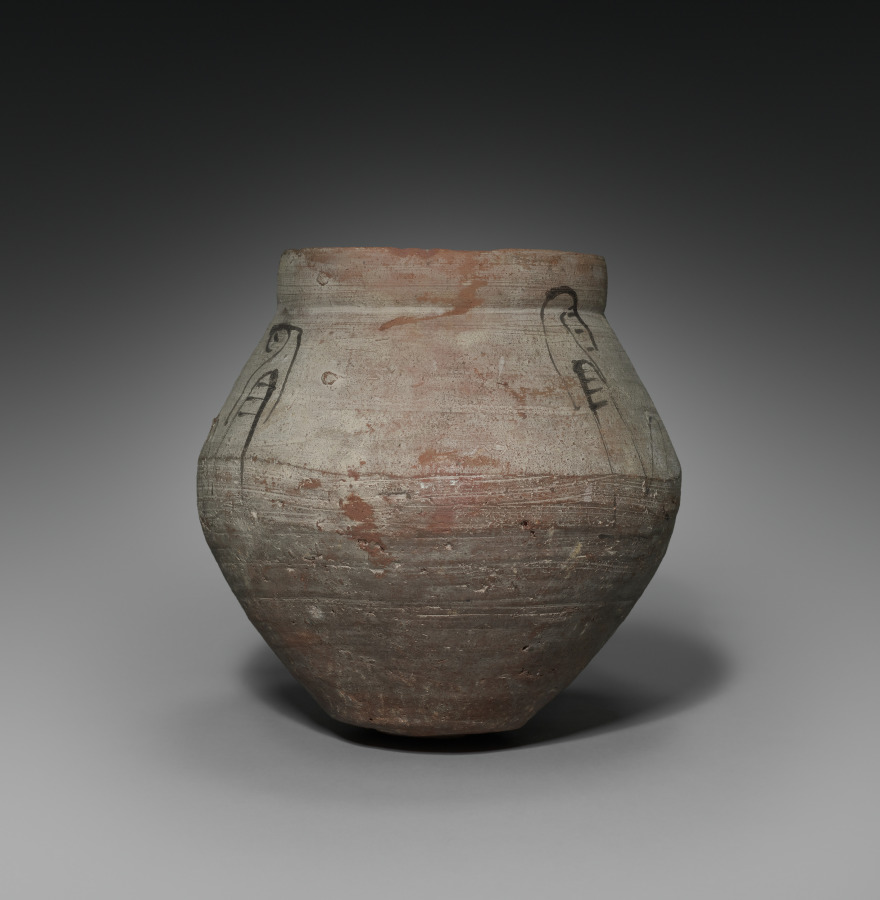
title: Shawabty Jar with Lid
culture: Egypt, New Kingdom (1540–1069 BCE), Dynasties 19–20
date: 1295–1069 BCE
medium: Nile silt ware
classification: Funerary Equipment